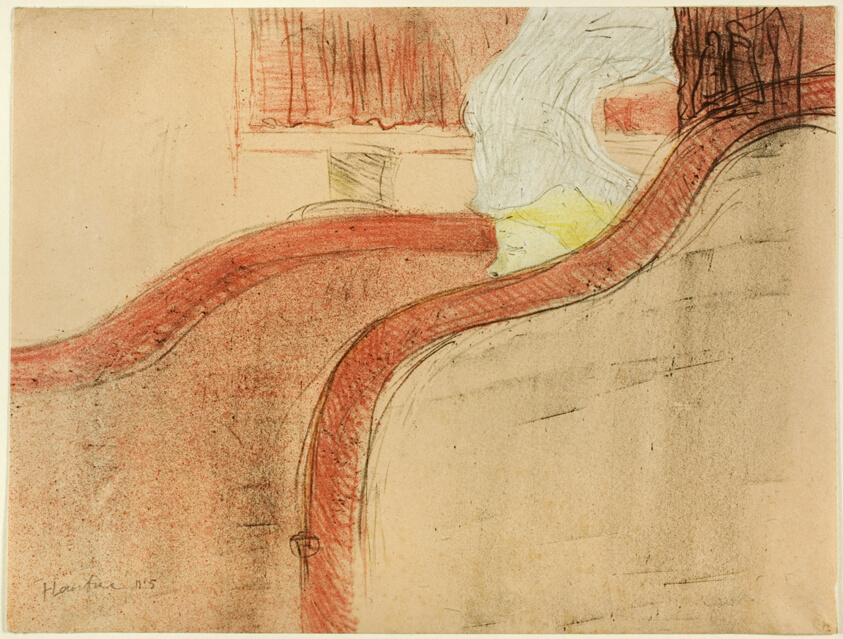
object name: Print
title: The Little Box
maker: Henri de Toulouse-Lautrec (French, 1864-1901)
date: 1897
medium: Color lithograph on ivory wove paper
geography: France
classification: lithograph; print; prints and drawing